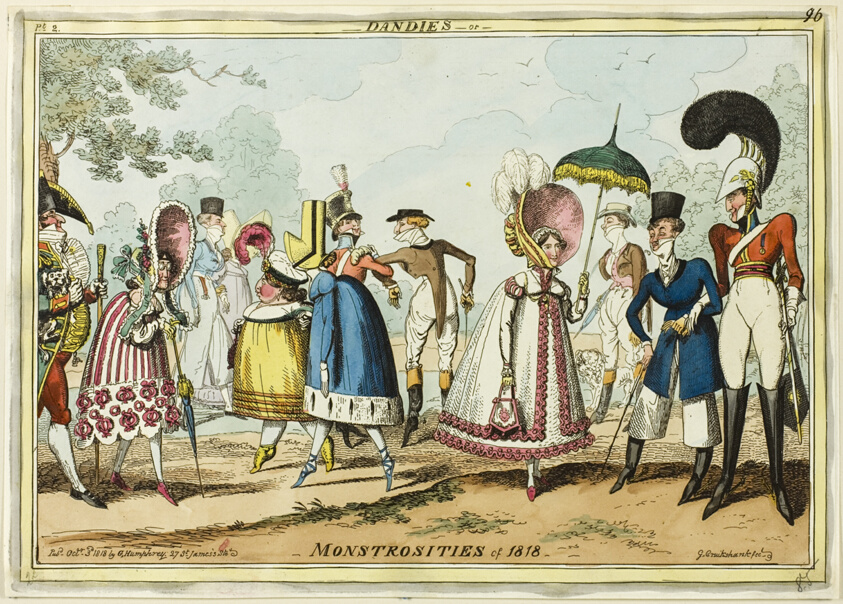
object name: Print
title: Dandies or Monstrosities of 1818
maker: George Cruikshank (English, 1792-1878); published by George Humphrey (English, c. 1773-1831)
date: published October 3, 1818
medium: Hand-colored etching on paper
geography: England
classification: etching; print; prints and drawing